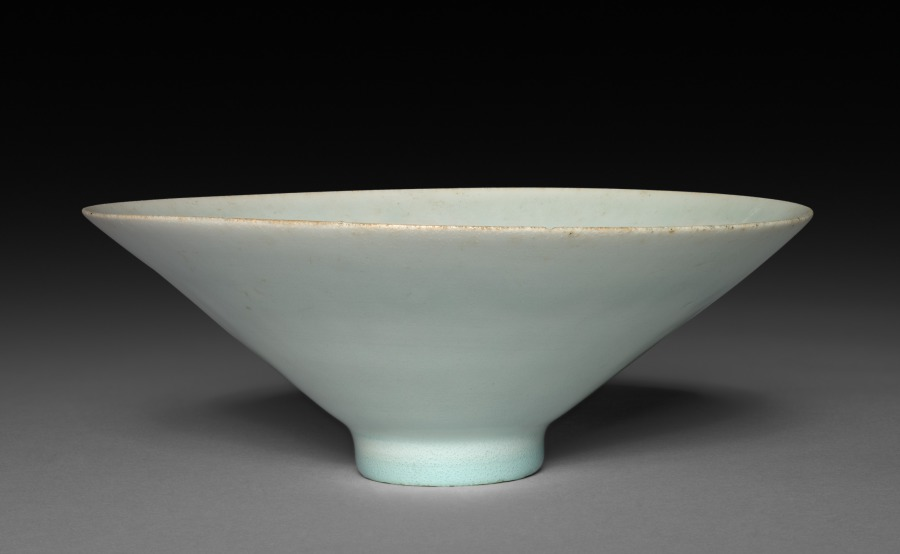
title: Conical Bowl with Floral Scroll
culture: China, Jiangxi Province, Jingdezhen kilns, Southern Song dynasty (1127–1279)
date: 1100s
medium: Glazed porcelain with incised decoration, qingbai ("blue-white") ware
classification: Ceramic